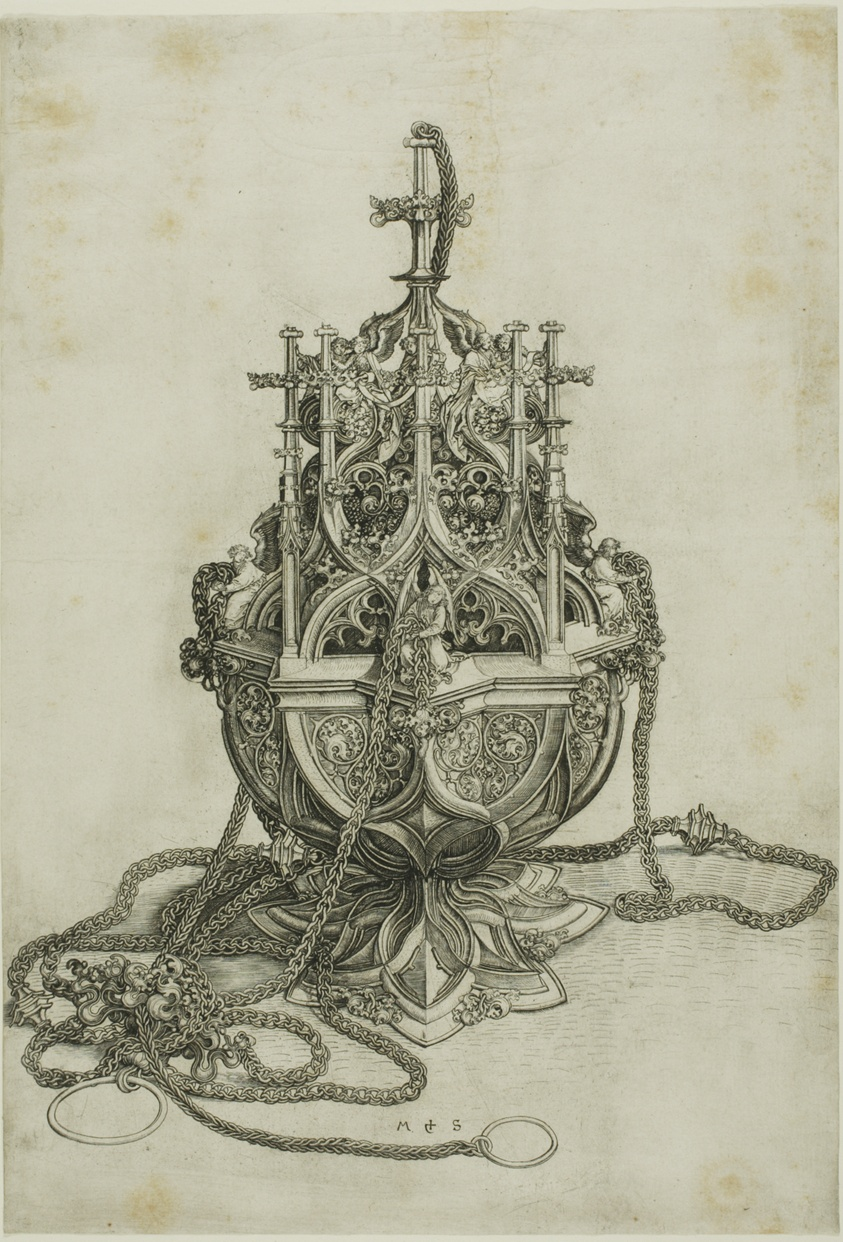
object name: Print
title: The Censer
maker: Martin Schongauer (German, c. 1430/50-1491)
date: 1470/74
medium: Engraving on cream laid paper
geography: Germany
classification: engraving; print; prints and drawing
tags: religion, rituals